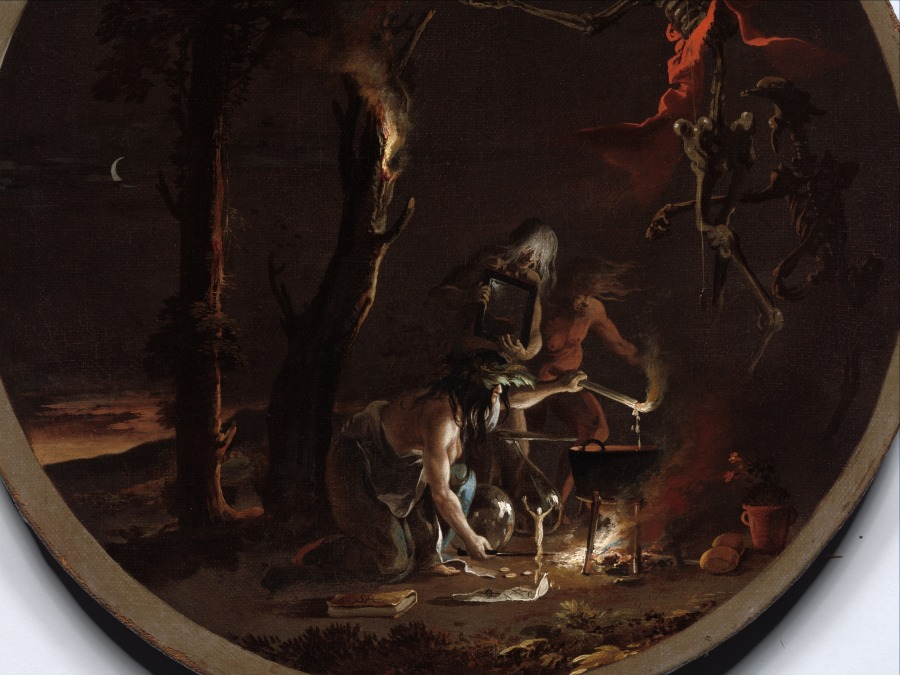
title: Scenes of Witchcraft: Evening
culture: Italy, 17th century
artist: Salvator Rosa (Italian, 1615–1673)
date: c. 1645–49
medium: oil on canvas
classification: Painting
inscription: Signed: "SR [monogram]"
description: At dusk, Rosa's hags gather around a cauldron. Above their incantations soars a conjured skeleton holding an hourglass symbolizing the brevity of life. In its left hand, the demonic creature holds a capital letter A from which extends a plumb line; as ancient signs of the moon and judgment, this strange combination of symbols embodies the nocturnal judgment the witches are doling out below. Though more rare in paint, the detailed portrayal of witches at their spells enjoyed a long literary tradition. The wax effigy alludes to classical literature by Virgil and Horace that described love magic. Poets in the 1500s and 1600s continued the tradition, writing verse about witches concocting potions and performing love spells. In Rosa's own poem "La Strega (The Witch)," the jilted Phyllis vows to take revenge on her feeble lover, listing the ingredients for her black magic: "ground powders, mystic gems, snakes and owls, stinking blood. . . ." Painting was considered "mute poetry" in the 1600s, and Rosa often explored the same themes in his written and painted art—a clever way to gain fame as a unique intellect.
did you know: The artist chose the painting's shape to reference the foundational role of the circle in practicing magic.